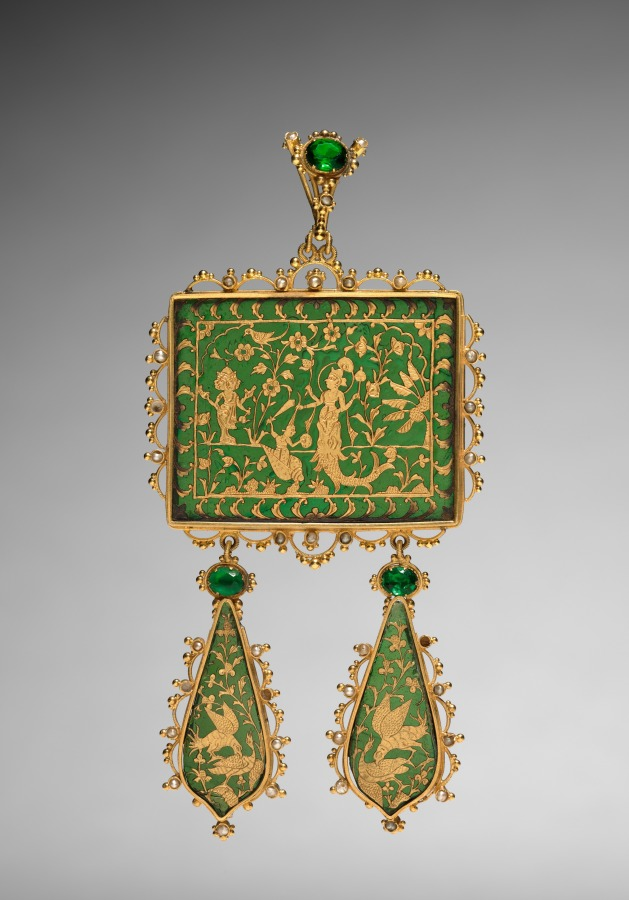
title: Pendant with Matsya (fish incarnation of Vishnu) defeating Hayagriva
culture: Northwestern India, Rajasthan Pratapgarh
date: 1800s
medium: gold, enamel, emeralds, and pearls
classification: Jewelry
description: Three emeralds and many pearls surround the central part of this pendant, which features a scene from the life of Matsya at the center. The fish incarnation of the preserver god Vishnu, Matsya appears in the middle, defeating the demon Hayagriva, who emerges from a shell, grasping him by the hair. Encircling the battle are plants, flowers, and designs indicative of ocean waves. The four-headed god Brahma also watches from the left side. Below the main scene, two smaller teardrop-shaped ornaments hang down. They feature scenes of predator birds, which may allude to the courtly falcon hunts of rulers.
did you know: In Matsya’s upper hands he holds two of Vishnu’s implements: the mace and the lotus.